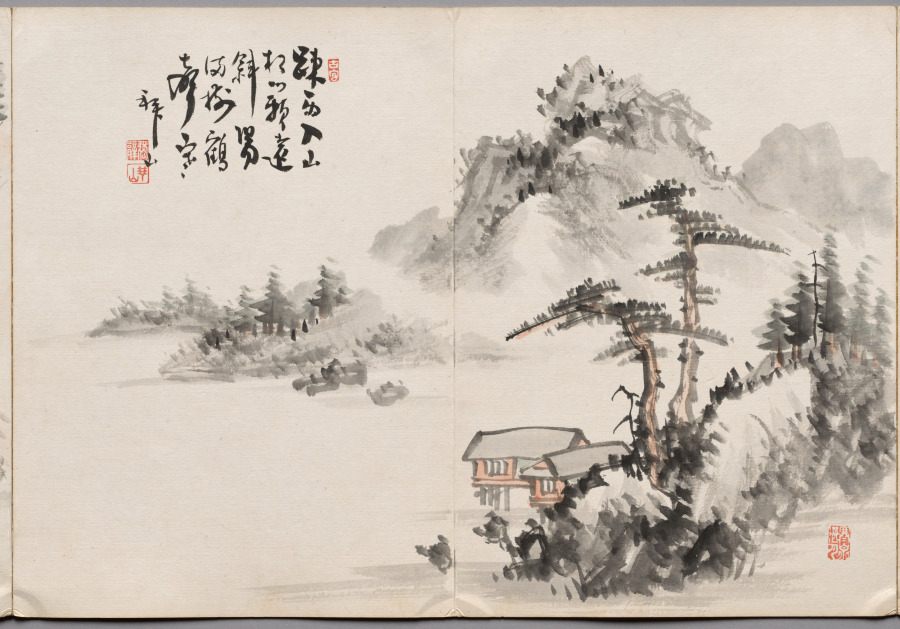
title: Painting One from Album of Paintings by Haizan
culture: Japan, Meiji period (1868–1912) or Taishō period (1912–26)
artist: Yoshitsugu Haizan (Japanese, 1846–1915)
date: late 1800s-early 1900s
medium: page spread from double-sided accordion album; ink and color on paper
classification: Painting